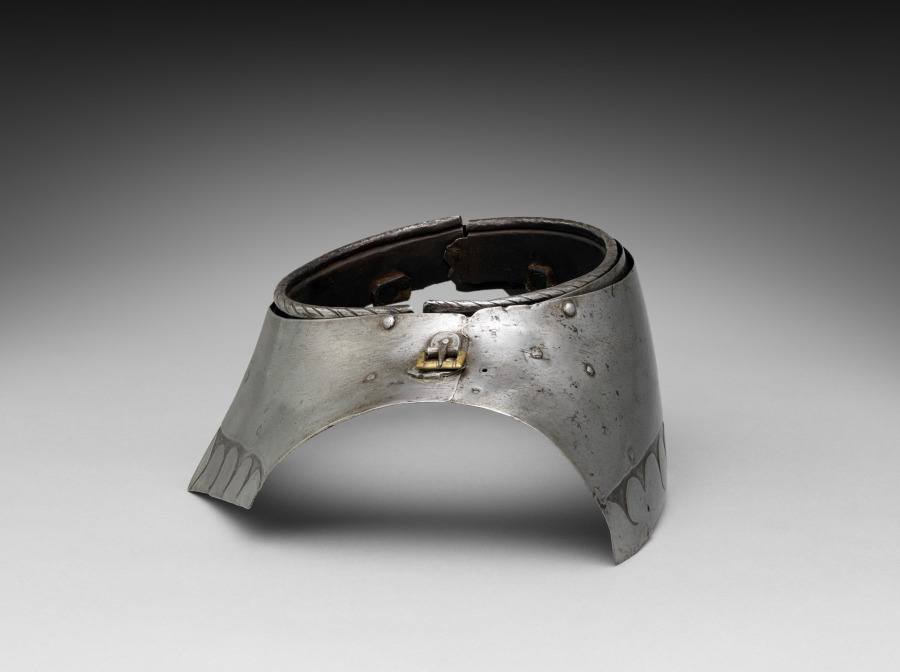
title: Gorget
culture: Germany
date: 1500s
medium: steel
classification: Arms and Armor